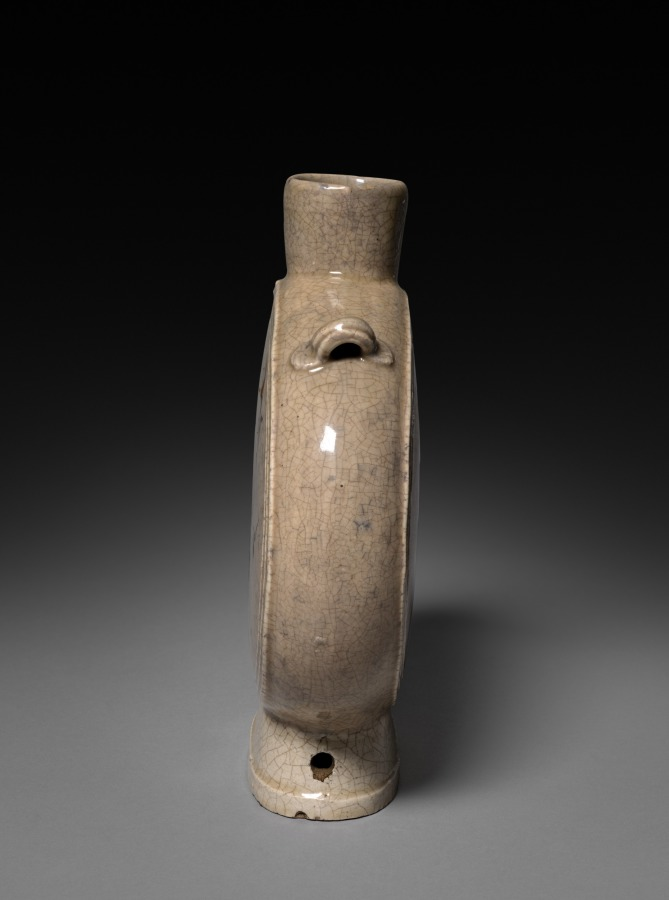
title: Pilgrim Bottle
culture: China, Ming dynasty (1368–1644)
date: 1368–1644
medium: porcelain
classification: Ceramic